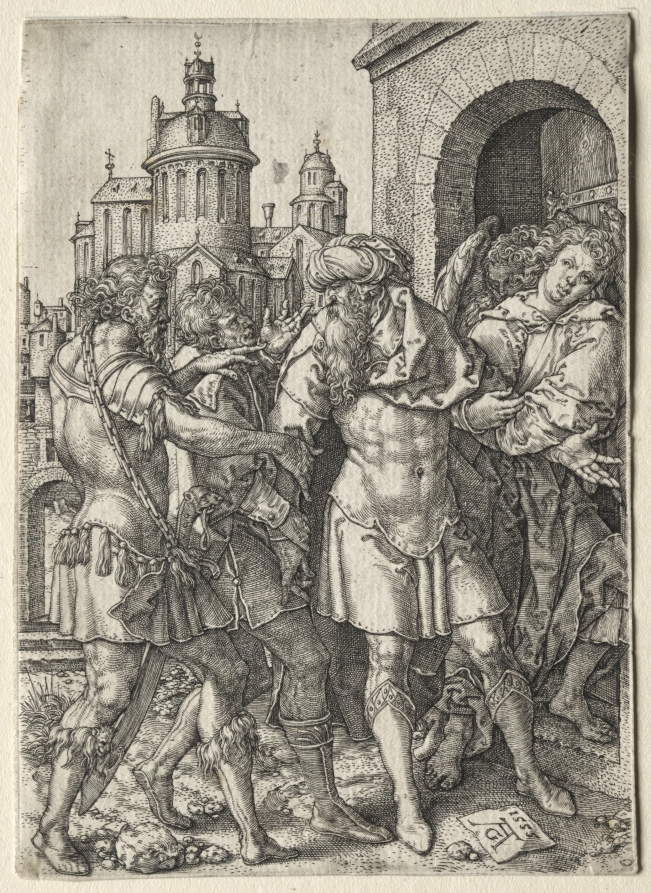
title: The Story of Lot: Lot Prevents the Sodomites from Violence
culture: Germany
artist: Heinrich Aldegrever (German, 1502–1555/61)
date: 1555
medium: engraving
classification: Print